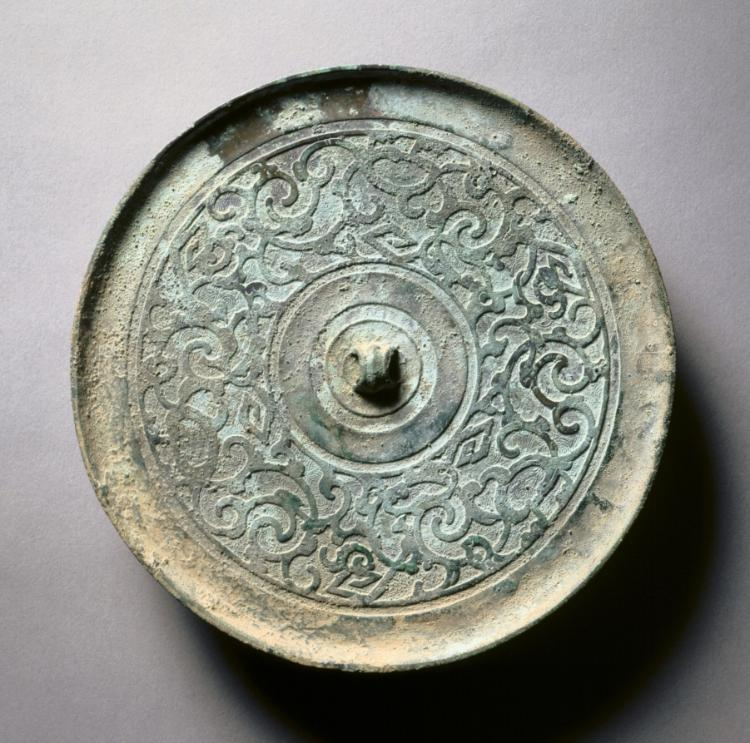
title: Mirror with Serpentine Interlaces and Angular Meanders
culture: China, Warring States period (475–221 BCE)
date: c. 325–275 BCE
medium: bronze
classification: Metalwork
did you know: This museum has the largest collection of Chinese mirrors outside of China.